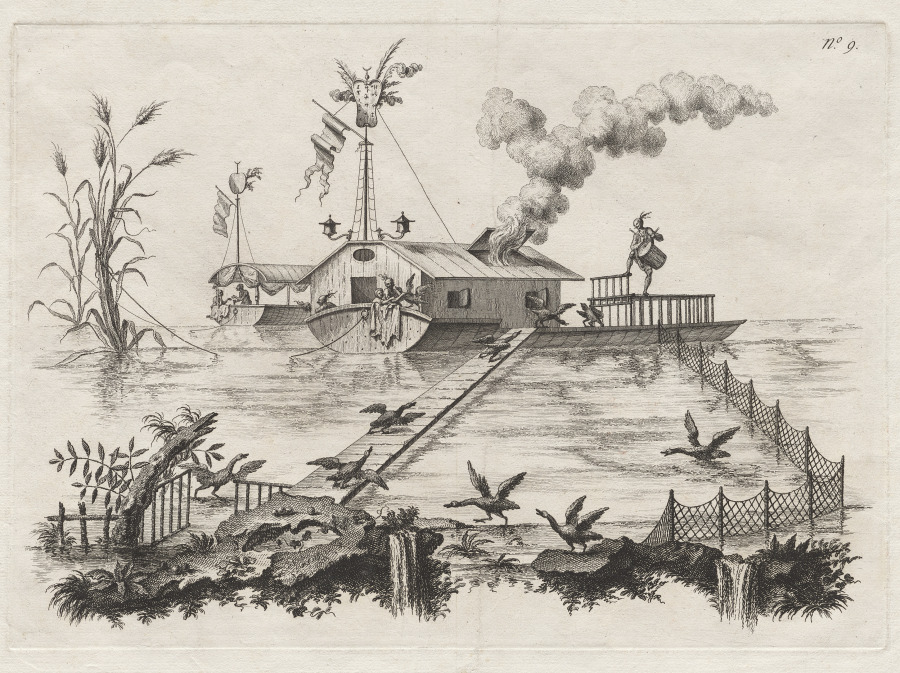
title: A House on Water, and a New Way to Summon Geese by the Beat of a Drum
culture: Italy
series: Suite of the Most Notable Things Seen by John Wilkins Erudite English Bishop during His Famous Voyage from the Earth to the Moon … dedicated to Sir William Hamilton ambassador to the Court of Naples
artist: Filippo Morghen (Italian, 1730–after 1807)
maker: possibly after Jean-Pierre-Louis-Laurent Hoüel (French, 1735–1813)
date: about 1769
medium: etching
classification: Print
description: Filippo Morghen’s set of 10 etchings is outstanding among visual narratives of imaginary voyages to the moon, both visual and literary, that intrigued 18th-century European audiences. A title page and nine plates depict the imagined lives and economy of moon dwellers. These include modes of transport such as large birds and sailboats propelled by giant bellows, enormous scissors for capturing wild beasts (including an oversized rat), and the use of giant pumpkins as fishing boats and as dwellings. Representations of the moon dwellers are based on inaccurate and imaginary European interpretations of Asian, Ottoman, and Native American cultures—called chinoiserie and turquerie—that permeated the decorative and visual arts of the period.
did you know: Morghen based this print series on three books dedicated to moon exploration, including Bishop Francis Godwin’s, Man in the Moone, 1640.